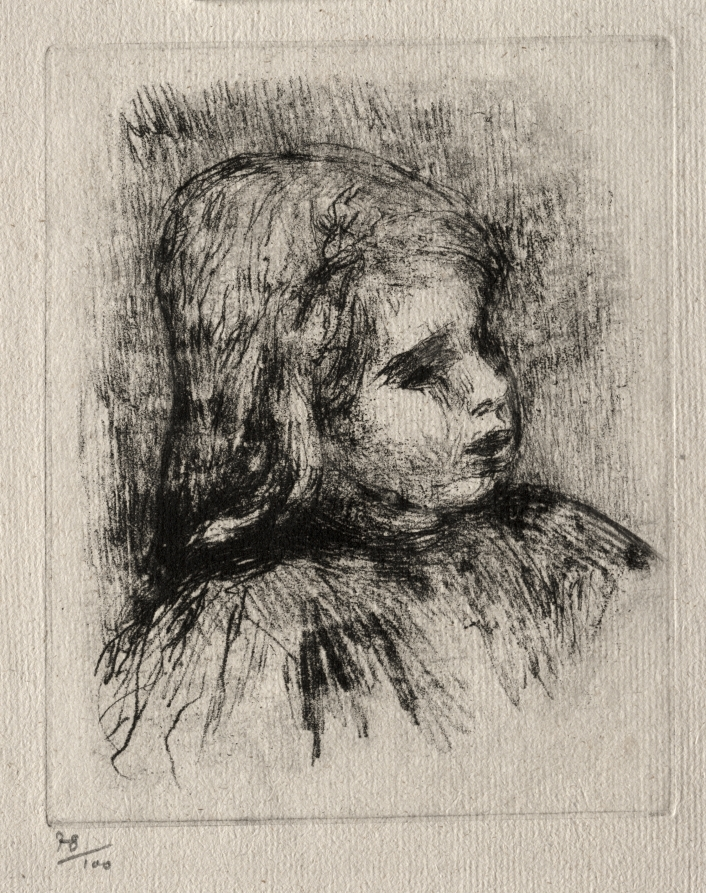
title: Claude Renoir, de trois-quarts à droite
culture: France, late 19th-early 20th Century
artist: Pierre-Auguste Renoir (French, 1841–1919)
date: 1908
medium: softground etching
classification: Print